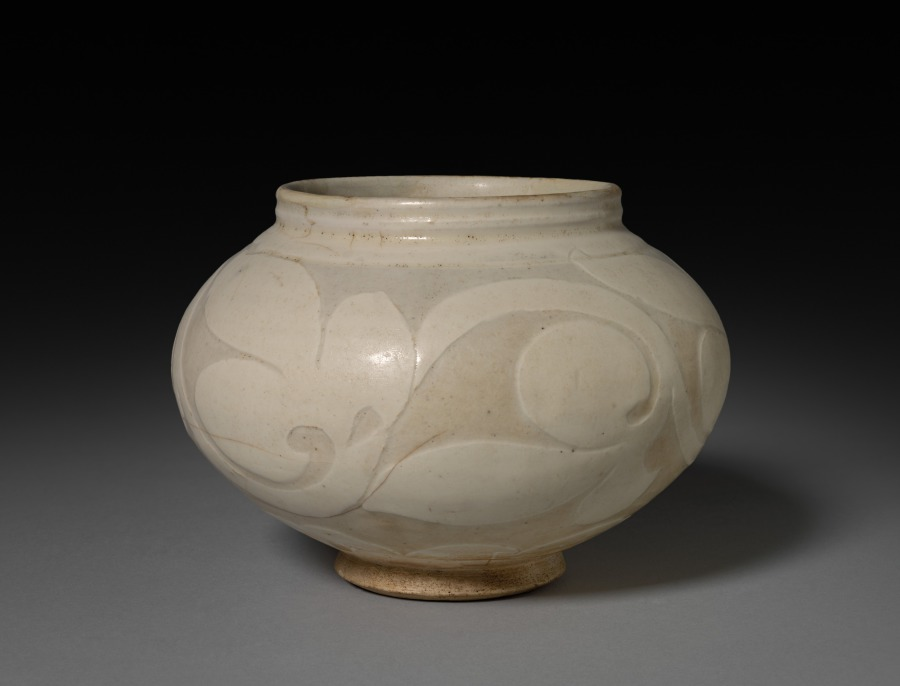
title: Jar: Cizhou ware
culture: China, Northern Song dynasty (960-1127) - Jin dynasty (1115-1234)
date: 12th-13th Century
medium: glazed light gray stoneware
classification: Ceramic